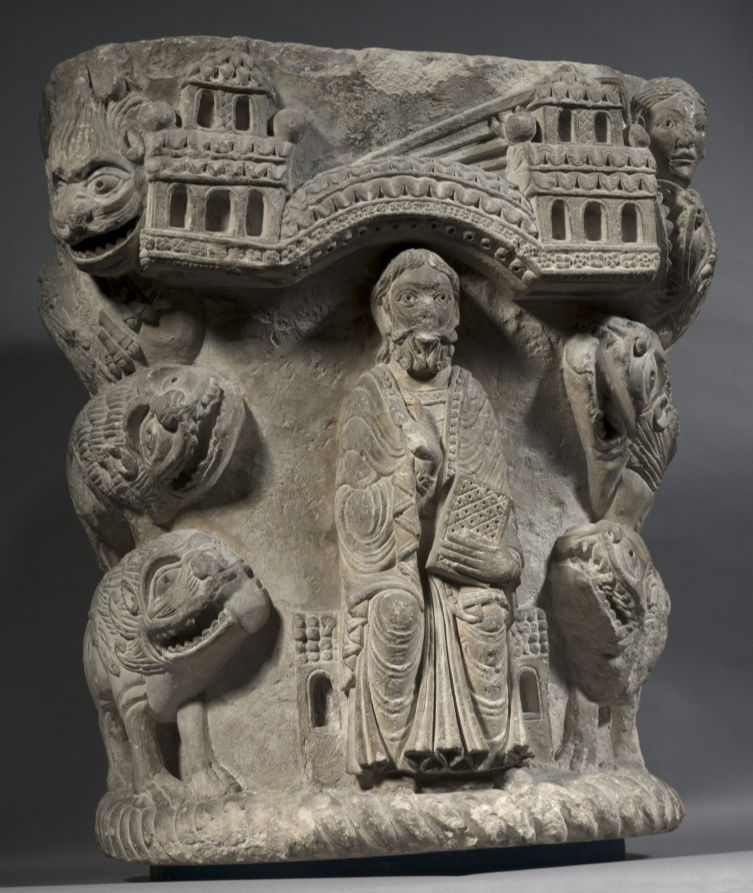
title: Daniel in the Lion's Den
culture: France, Saint-Aignan-sur-Cher, 12th century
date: c. 1125–50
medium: limestone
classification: Sculpture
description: According to the Old Testament, Daniel was cast into a lion’s den as punishment for his belief in a single god, but he was miraculously delivered from harm on account of his faith. This story is related here, with Daniel flanked by lions and the angel sent by God to save him. Together with other decorated capitals, this imposing work of Romanesque sculpture once decorated the interior of the church of Saint-Aignan-sur-Cher, a city in central France.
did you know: During the 12th century, churches used images to teach the faithful who were illiterate. While Daniel lived before Jesus, he is depicted holding a bible, alluding to the continuity between the Old and New Testaments.